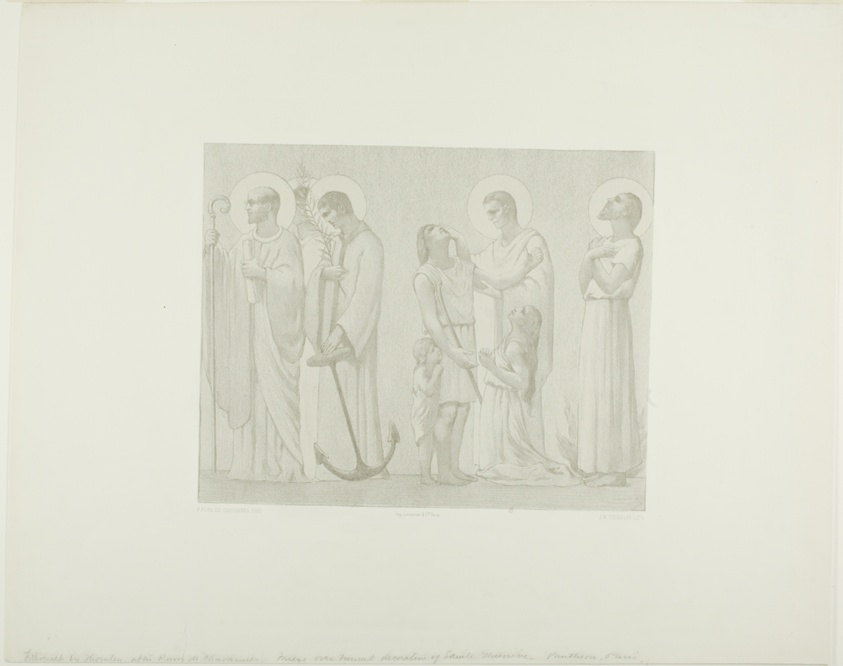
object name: Print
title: Legendary Saints of France (center frieze)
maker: Georges-William Thornley (French, 1857-1935); after Pierre Puvis de Chavannes (French, 1824-1898)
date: c. 1888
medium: Lithograph on paper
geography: France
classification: lithograph; print; prints and drawing